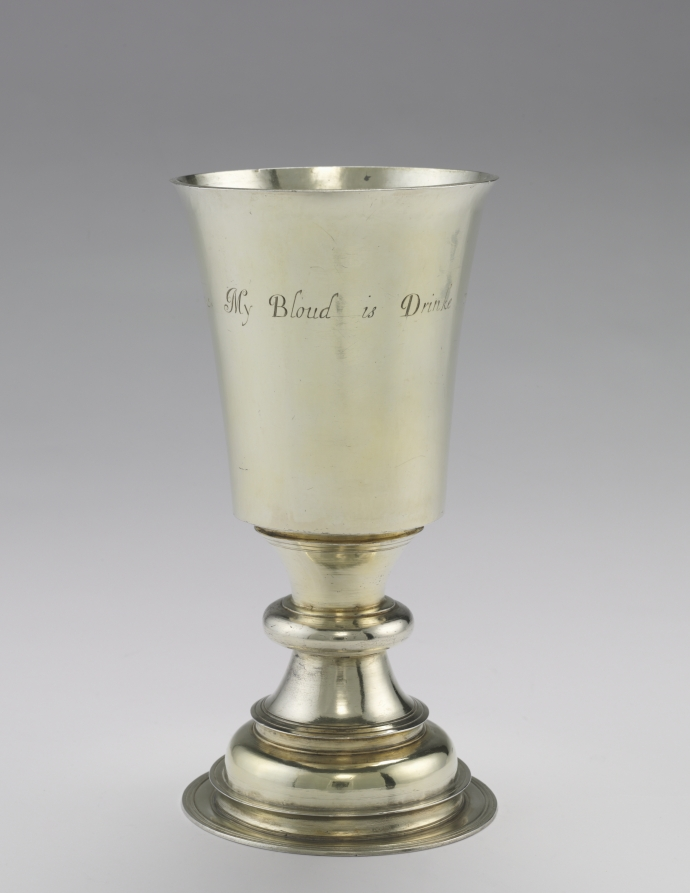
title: Communion Cup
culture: England, London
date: 1671–72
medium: silver gilt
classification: Silver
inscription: engraved on body of cup: "My Bloud is Drinke indeed."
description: This cup was produced shortly after the death of Oliver Cromwell (1599–1658), a leader of the English Civil War and Lord Protector of the British Isles from 1653 to 1658. An intensely religious man, Cromwell believed that the Reformation (1517–1648) failed to sufficiently eliminate Catholic beliefs and practices in Great Britain. The simplified shape and design of this vessel reflects his desire to visually differentiate Protestant communion cups from the chalices used by the Roman Catholic Church.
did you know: The words engraved along the exterior of this cup, "My Bloud is Drinke indeed,” refer to Christ’s instructions during the Last Supper, as described in the New Testament of the Christian Bible.